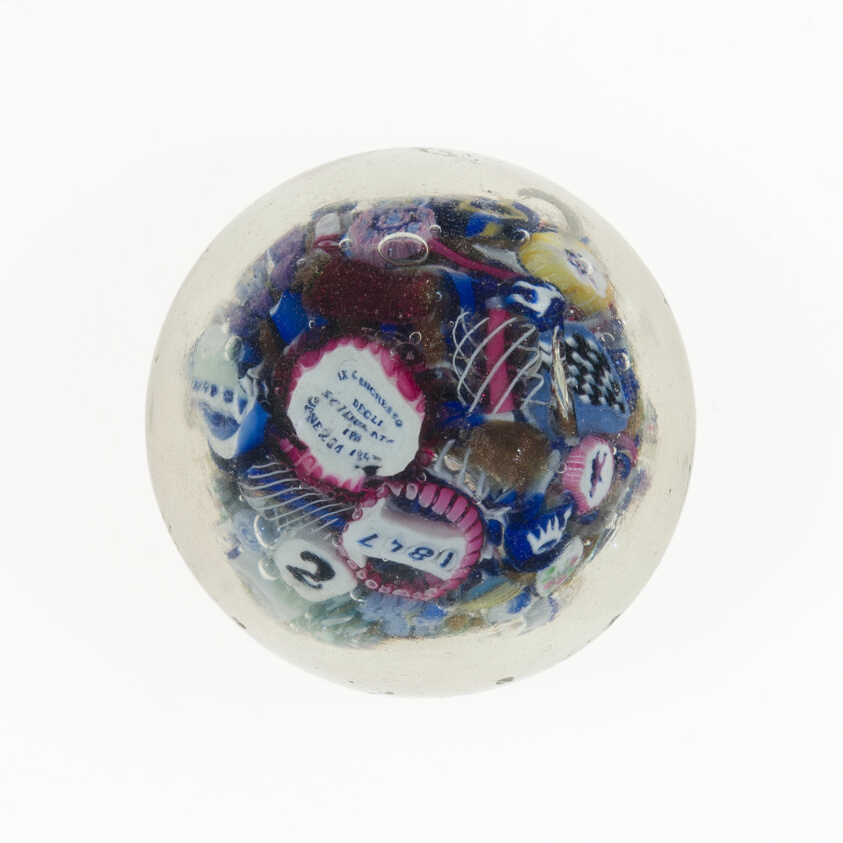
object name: Glass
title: Paperweight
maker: Pietro Bigaglia (Italian, 1786-1878)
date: 1847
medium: Glass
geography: Italy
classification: paperweight; millefiori; european decorative arts; glass